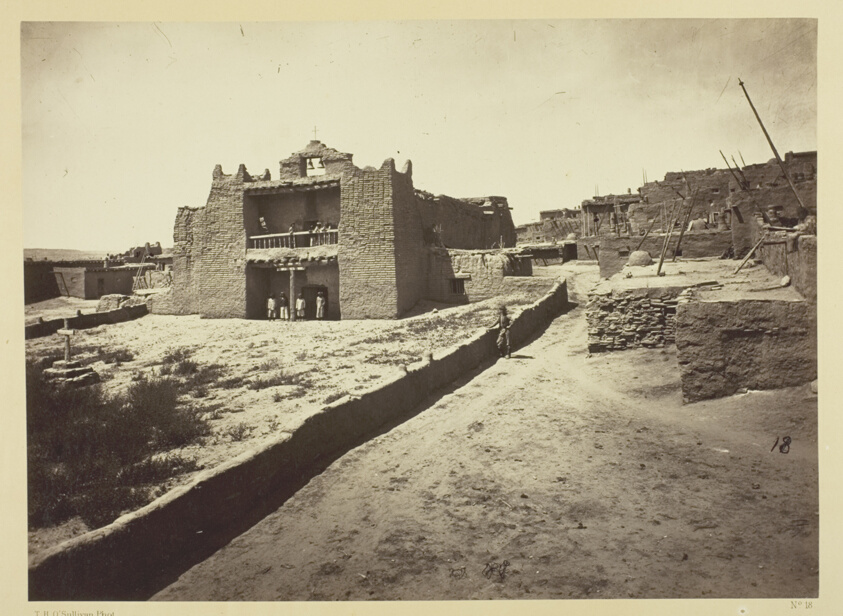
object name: Photograph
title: Old Mission Church, Zuni Pueblo, N.M. View from the Plaza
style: 19th century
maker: Timothy O'Sullivan (American, born Ireland, 1840–1882)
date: 1873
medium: Albumen print, from the album "Geographical & Geological Explorations & Surveys West of the 100th Meridian," vol. 2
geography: United States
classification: albumen print from collodion negative; photograph; photography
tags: Collected by Hugh Edwards